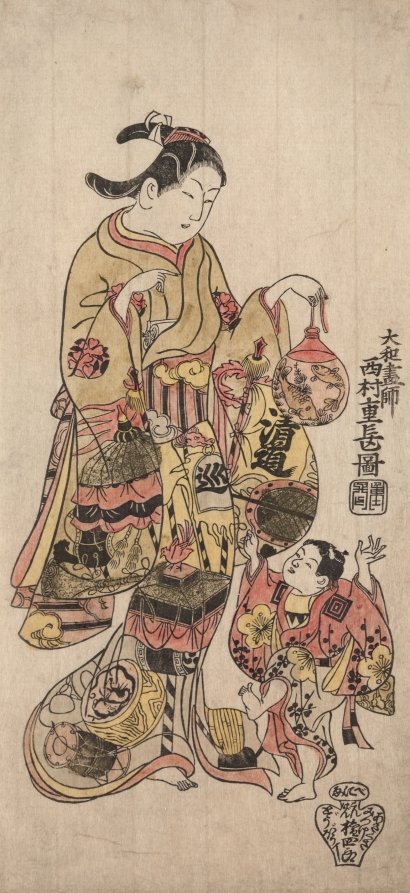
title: Child Reaching for a Fishbowl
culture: Japan, Edo period (1615–1868)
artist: Nishimura Shigenaga (Japanese, 1697?-1756)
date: c. mid 1720s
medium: hand-colored woodblock print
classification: Print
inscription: Signature: Yamato eshi Nishimura Shigenaga zu Artist Seal: Shigenaga Publisher: Izumiya Gonshiro (Benie kongen Asakusa mitsuke dobocho Gonshiro)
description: This early hand-colored print is enriched with a technique called urushi-e (literally “lacquer picture”), in which glue is painted over areas of black pigment, producing a lustrous surface reminiscent of lacquer. Metal filings sprinkled onto the designs of parasols, a fan, and musical instruments on the woman’s kimono enhance the sense of luxury.